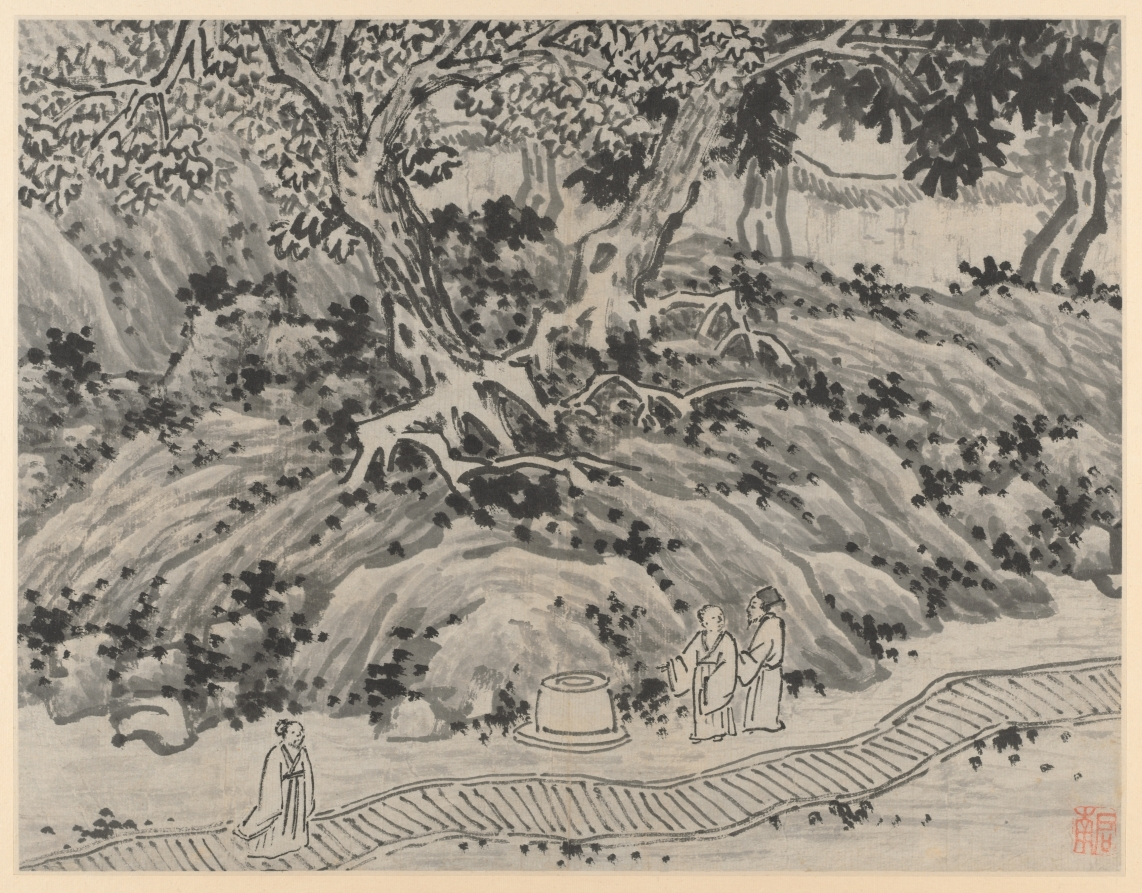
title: The Fool's Spring, from Twelve Views of Tiger Hill, Suzhou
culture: China, Ming dynasty (1368–1644)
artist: Shen Zhou (Chinese, 1427–1509)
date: after 1490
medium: Album leaf; ink on paper or ink and slight color on paper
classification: Painting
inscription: [印] 启南; 石田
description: Views of Tiger Hill depicts a historic site a few miles northwest of Suzhou. The scenes simulate a visit from arriving by boat at the foot of the mountain to climbing to Cloudy Cliff Monastery. Representations of the artist’s mature style, Shen Zhou included views in subtle colors in the suite of monochrome scenes. A Suzhou native, Shen Zhou was supported by family wealth and rejected an official career in favor of life as a retired scholar. Turning to painting in midlife, he is regarded as the founder of the Wu School of painting, with its center in Suzhou.